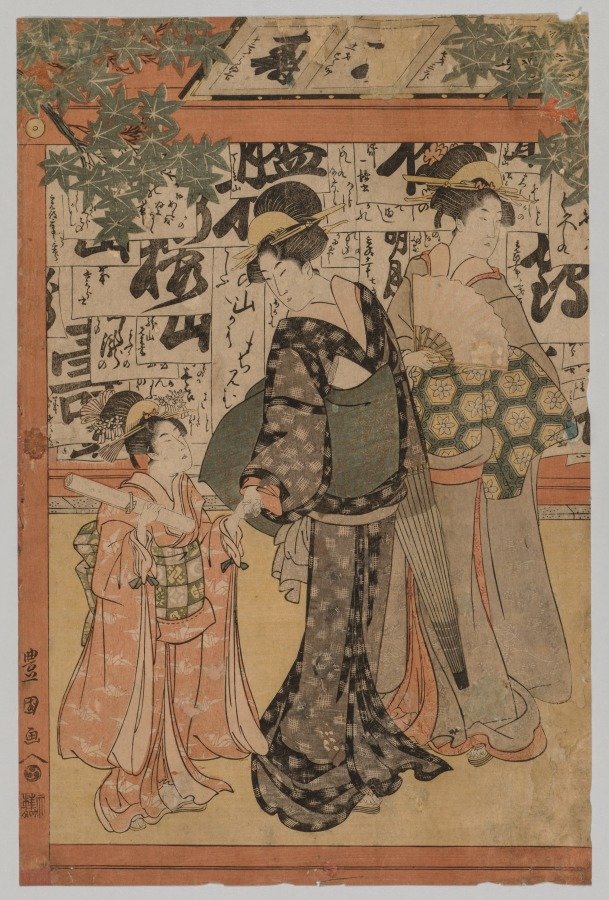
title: Examination for Writing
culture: Japan, Edo period (1615–1868)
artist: Utagawa Toyokuni (Japanese, 1769–1825)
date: 1769–1825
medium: color woodblock print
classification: Print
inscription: Signature: Toyokuni gwa Publisher Mark: Yeijudo